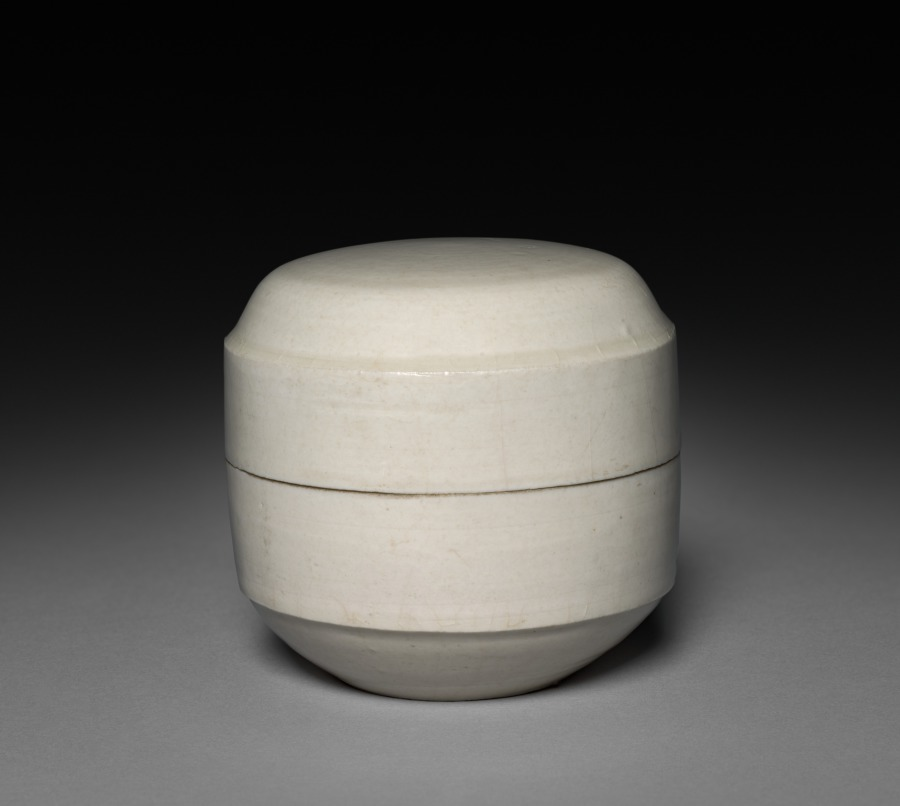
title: Covered Box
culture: China, Hebei province, Quyang, Northern Song dynasty (960–1127)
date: 1000s–1100s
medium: white porcelain, Ding ware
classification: Ceramic